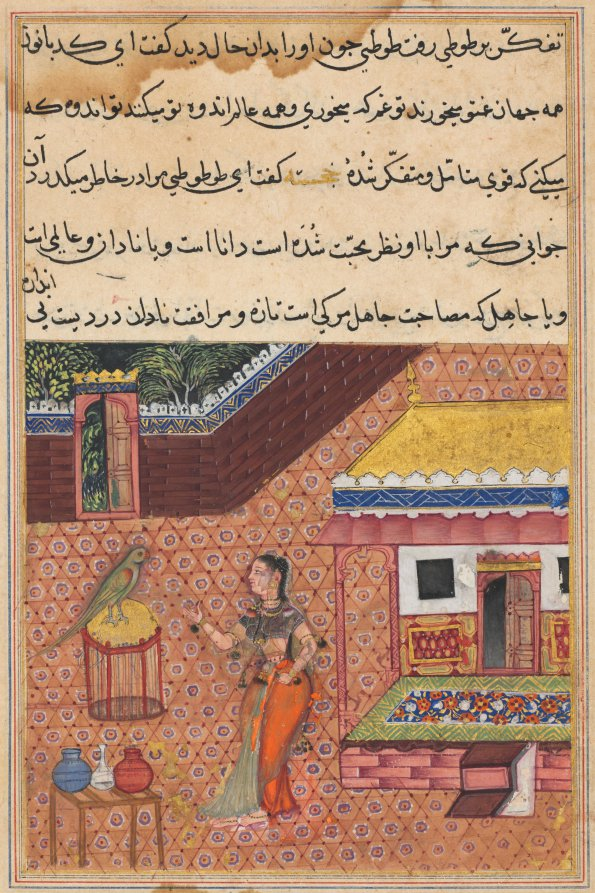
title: The parrot addresses Khujasta at the beginning of the thirty-fourth night, from a Tuti-nama (Tales of a Parrot)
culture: Mughal India, court of Akbar (reigned 1556–1605)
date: c. 1560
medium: gum tempera, ink, and gold on paper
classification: Painting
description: On the thirty-fourth of fifty-two nights, Tuti the wise parrot tells Khujasta two fantastical stories. The first is about the daughter of a merchant who was saved from an evil fairy by her many suitors. The second features the daughter of a raja who witnessed the miraculous resurrection of her dead husband and his friend.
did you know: A small cord around the parrot’s legs keeps him anchored to his cage.